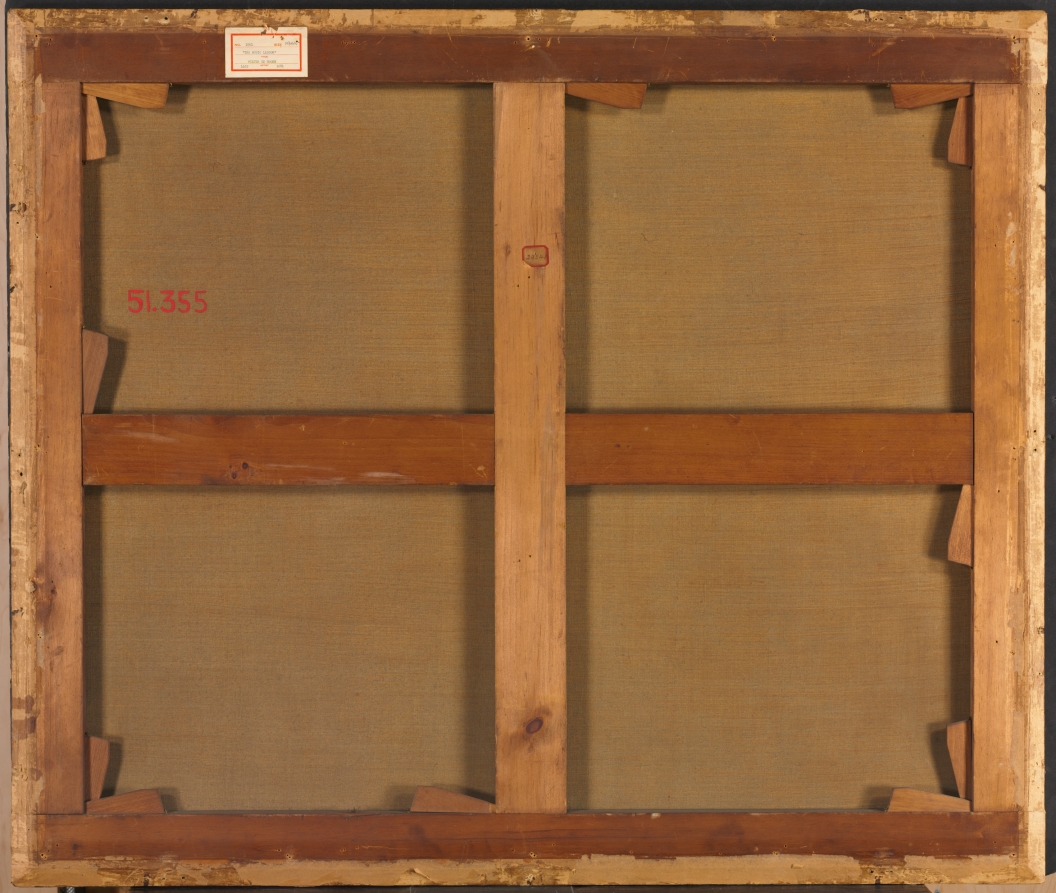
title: Portrait of a Family Playing Music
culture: Netherlands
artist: Pieter de Hooch (Dutch, 1629–1684)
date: 1663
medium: oil on canvas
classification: Painting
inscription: Signed lower left: "P D HOOCH/ 63"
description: The identity of the sitters remains unknown, although the marble floor and mantelpiece, the Transylvanian prayer rug on the table, and the silk clothes all point to the family’s considerable wealth. Furthermore, the richly carved chest at the right supports Chinese vases and Japanese lacquered boxes, a reference to the flourishing Dutch trade with Asia. Music making often took place at home, and its appearance here also signifies the harmoniousness of the family.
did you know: During this period, the Dutch Republic was the richest, most urbanized nation.